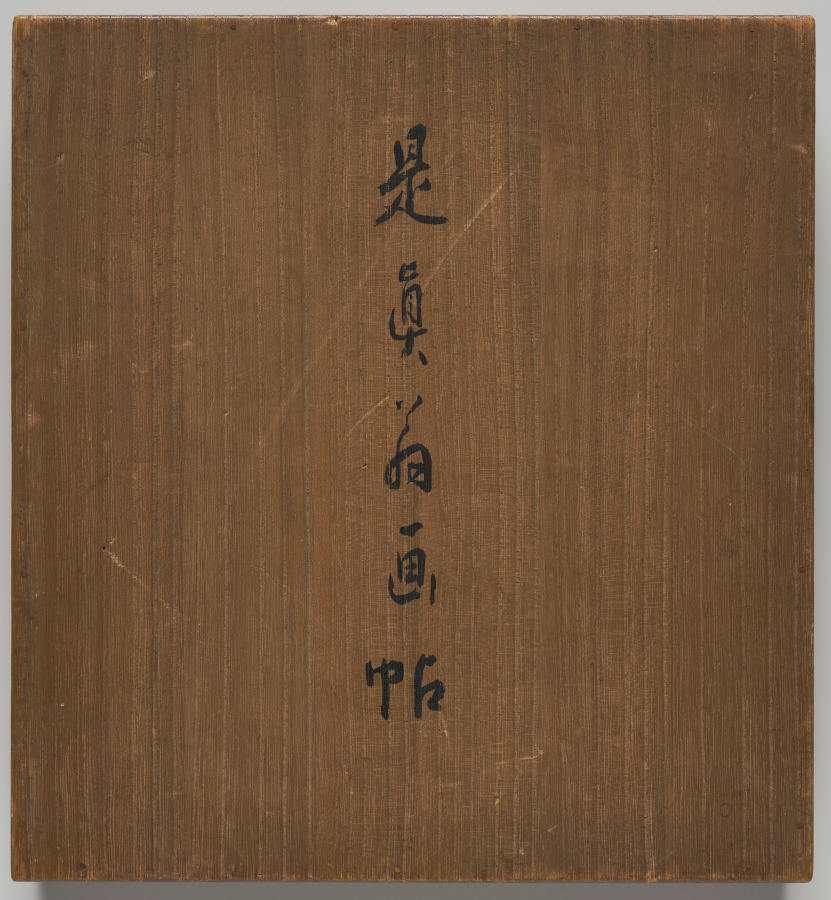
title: Album of Paintings by the Venerable Zeshin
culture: Japan, Edo period (1615–1868)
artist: Shibata Zeshin (Japanese, 1807–1891)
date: 1847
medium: accordion-style album of 12 leaves; ink, color, and gold on silk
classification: Bound Volume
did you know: Textile covers for albums help protect the works of art inside and add to their appeal--the title slip for this album has been left blank.